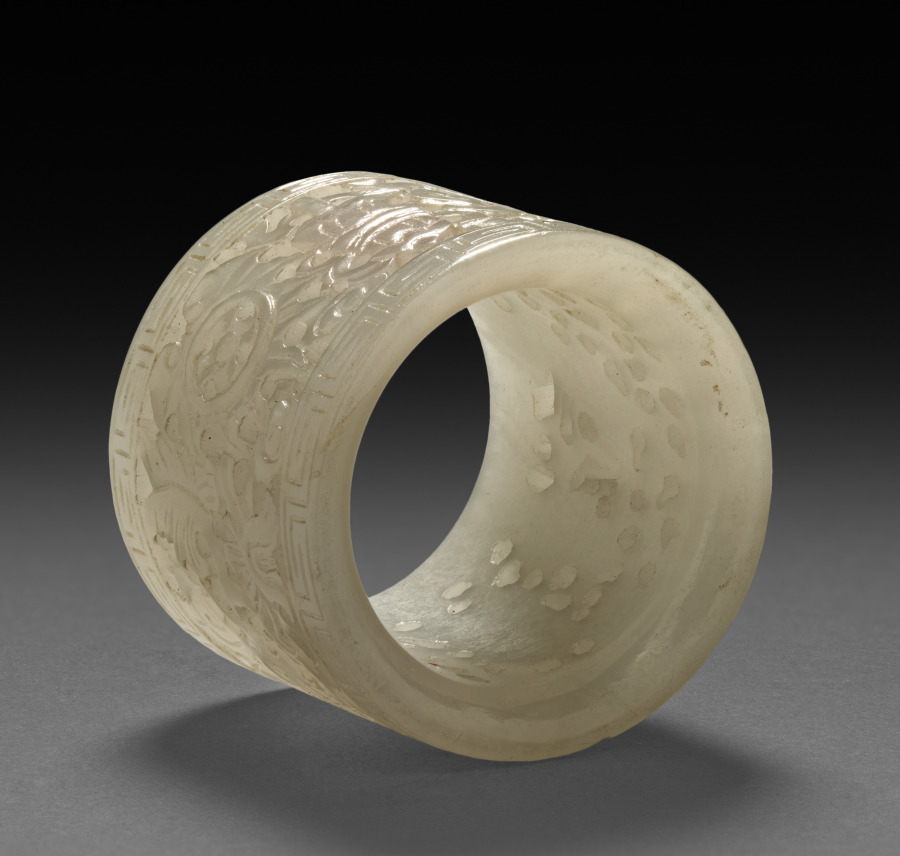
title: Thumb Ring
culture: China, Qing dynasty (1644-1911) or Republican period (1912-49)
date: 1800s–1900s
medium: white jade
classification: Jewelry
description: Jade rings were worn by men on the thumb of the right hand to assist with holding and pulling the string of the archer’s bow. However, thumb rings were also fashionable accessories for civil officials in the late Qing dynasty.